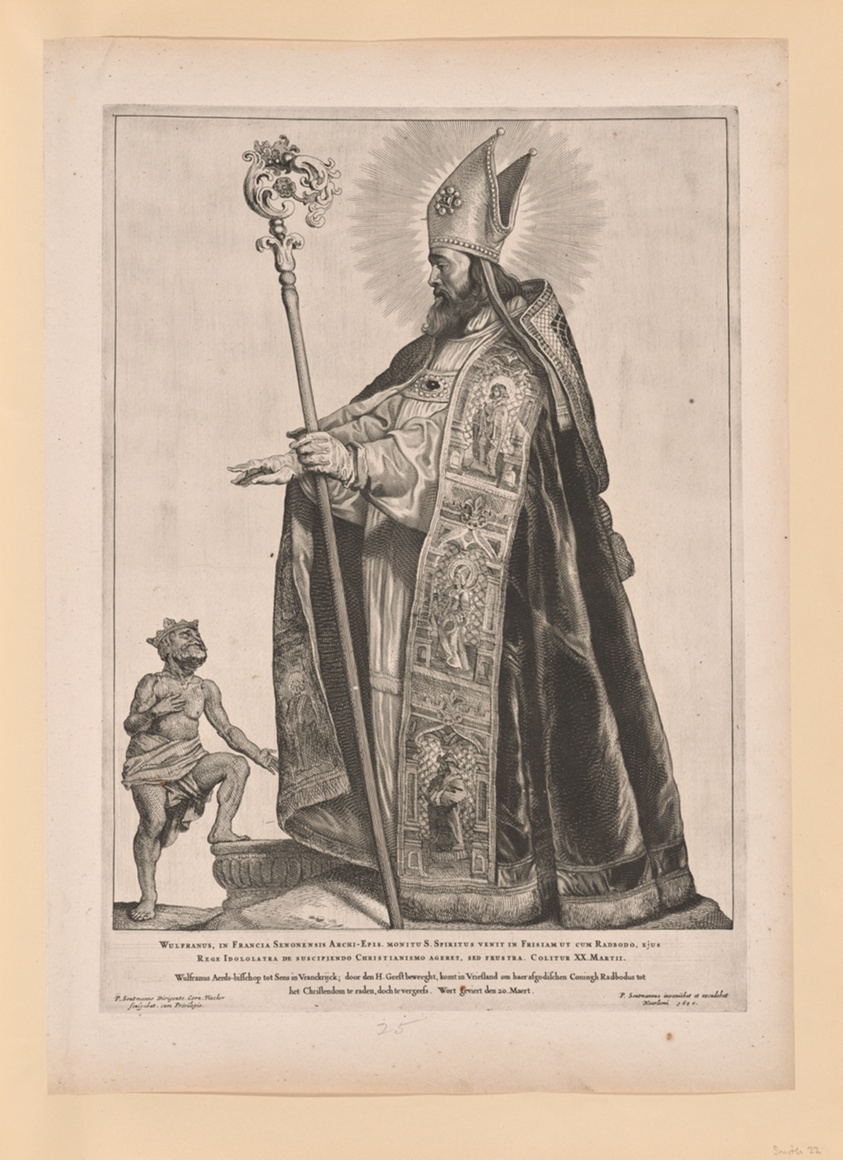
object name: Print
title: Saint Swithbert, from Saints of the North and South Netherlands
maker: Cornelis Visscher (Dutch, c. 1629-1658); after Pieter Claesz. Soutman (Dutch, c. 1580–1657)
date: 1650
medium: Etching and engraving on paper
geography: Netherlands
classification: engraving; paper; print; prints and drawing